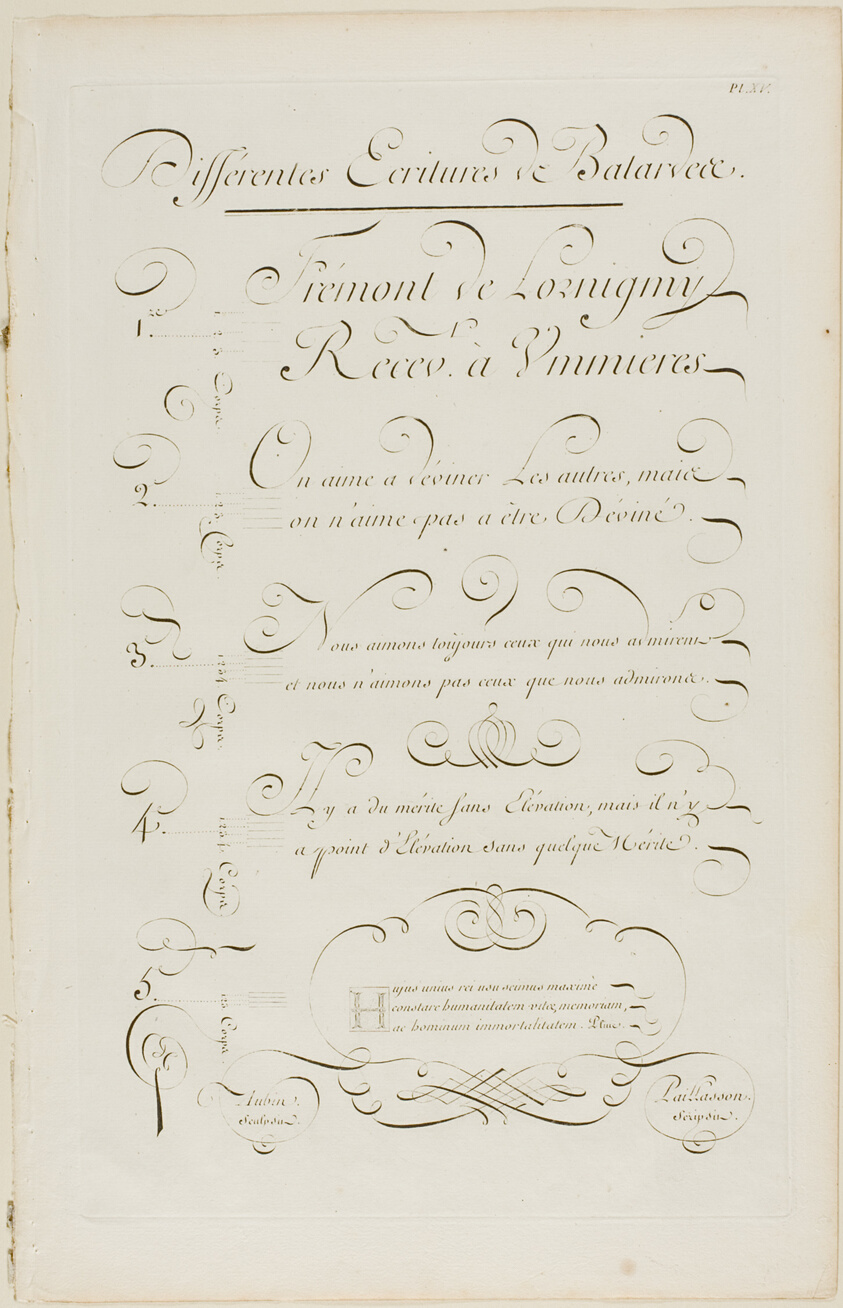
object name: Print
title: Various Slanted Calligraphy, from Encyclopédie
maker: Aubin (French, active 18th century); after Charles Paillasson (French, 1718-1789); published by André le Breton (French, 1708-1779), Michel-Antoine David (French, c. 1707-1769), Laurent Durand (French, 1712-1763), and Antoine-Claude Briasson (French, 1700-1775)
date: 1760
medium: Engraving on cream laid paper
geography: France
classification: engraving; print; prints and drawing